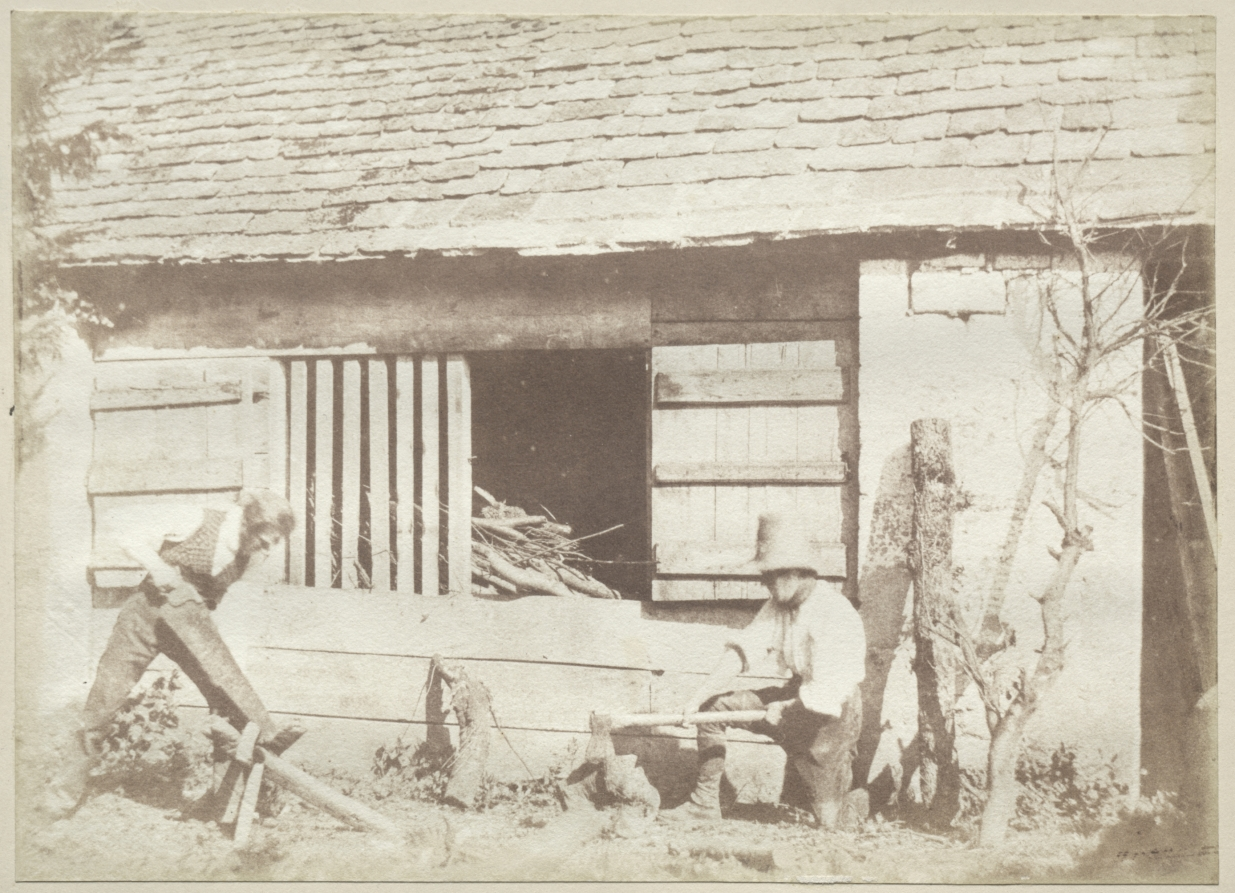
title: The Woodcutters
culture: England, 19th century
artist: William Henry Fox Talbot (British, 1800–1877)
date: 1845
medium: salted paper print from calotype negative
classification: Photograph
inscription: Written in black ink on verso: "LA 509 [crossed out] 559"